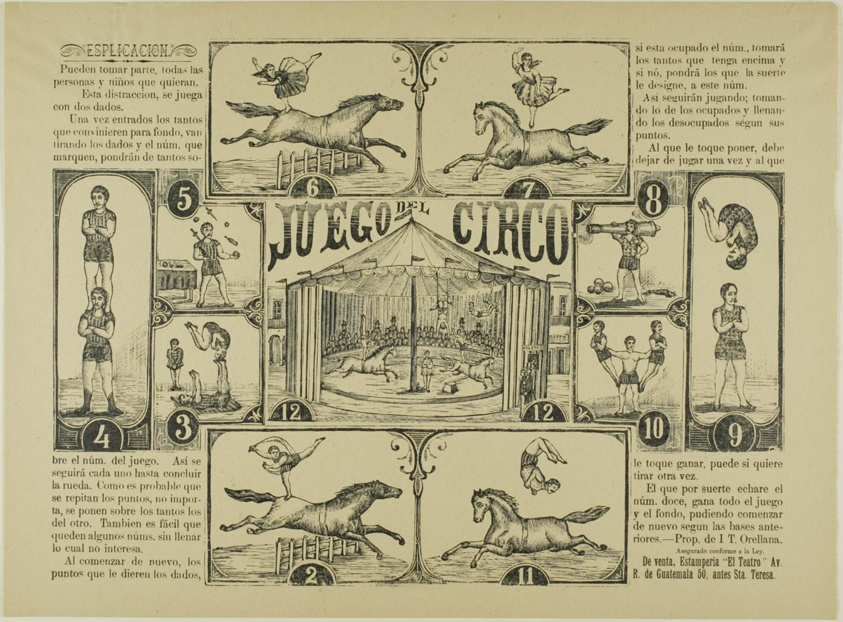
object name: Print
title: Circus Game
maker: Manuel Manilla (?); Mexican, 1830-c. 1900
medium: Relief engraving or photo relief etching on tan wove paper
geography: Mexico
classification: relief etching; print; prints and drawing